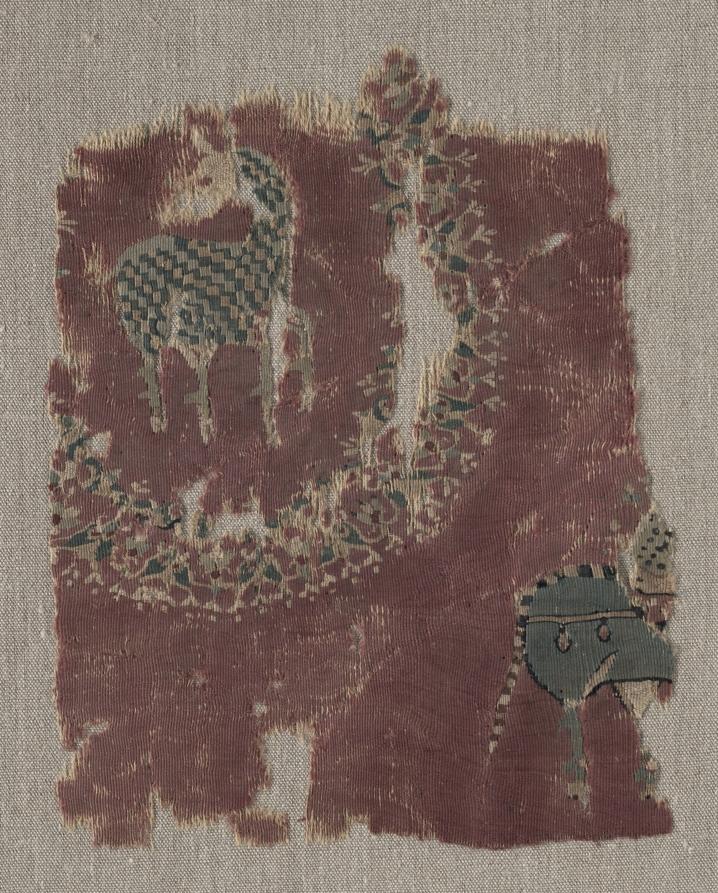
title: Hanging with foliate roundel and rider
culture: Iran or Iraq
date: 700s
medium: tapestry weave: wool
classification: Textile